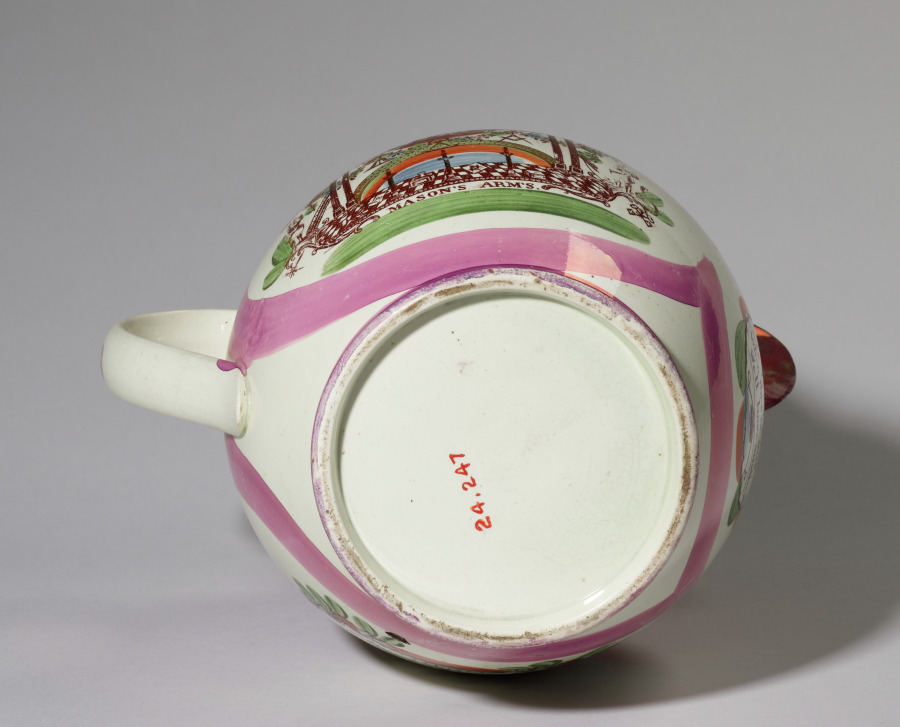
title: Masonic Pitcher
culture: England, Staffordshire, late 18th-early 19th Century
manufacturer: Staffordshire Factory (British)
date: c. 1800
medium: pottery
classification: Ceramic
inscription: on front: "MASON'S ARMS"; on one side: "A little health a little wealth, a little house with freedom, And at the end a little friend With little cause to need him"; on other side: "Here's to you My Jovial brother, When this is out We'll have another."